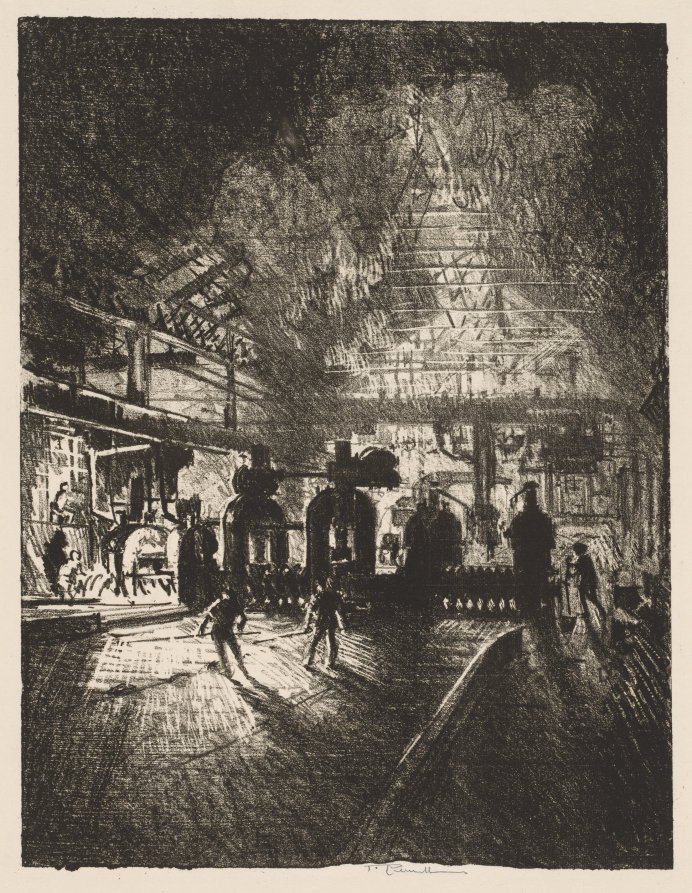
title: English War Work: In the Jaws of Death, Rolling Bars for Shells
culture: America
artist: Joseph Pennell (American, 1857–1926)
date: 1916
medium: lithograph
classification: Print